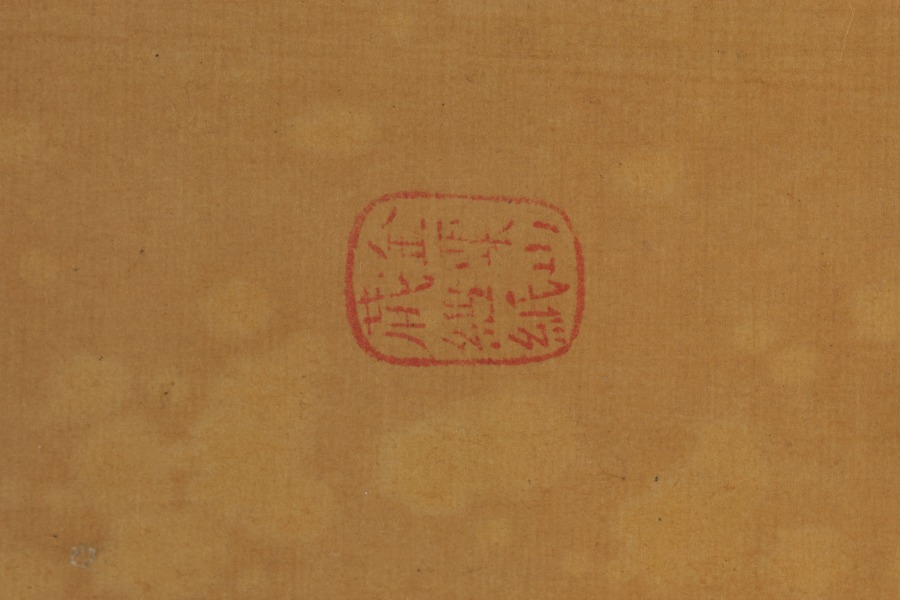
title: Flowers of Four Seasons, with Poems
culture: China, Ming dynasty (1368–1644)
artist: Wang Guxiang (Chinese, 1501–1568)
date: 1531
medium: handscroll; ink and light color on silk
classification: Painting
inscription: Artist's inscription, signature, and 15 seals. Ink Orchids. Sewn as pendants for the man of worth, swaying quiety, fragrance in the valley. [seal] Hsiao-chu ts'un Peony. Wiping his face, the young gentleman Ho [Ho Yen of Wei, Three Kingdoms] appears to have been powdered. His previous life was the perfume-stealing Han Shou [of Chin, 265–419 CE], the fragrance still lingers. [seal] Ts'un-wu chai. Flowering Crab Apple, New Bamboo. Shao-lin [Du Fu, 712–770] had to put down his brush. [Flowering Crab Apple]. Yü-k'o [Wen T'ung, d. 1079) in vain wrote poems about [Bamboo]. [seal] Yu-shih. Lotus Flowers. When she turns her head, half-hidden by a fan, and casts a glance, all the beautiful women become colorless. [seal] K'ang yüeh huai. Loquat. Ripeness in summer. [seal] Lu-chih. Pomegranate Flower. Whenever I remember you I will send my thoughts, but where have you gone--the [skirt] of pomegranate red? [seal] Wu-ho Sheng. Day Lily. Plant the day lily to forget sorrow. [seal] Yu-shih. Chrysanthemum. The untrammelled joy at the eastern fence. [seal] Lu-chih. Begonia. Comparing it to the beauties of Spring, and spreading them out as trimming for the stone steps. [seal] Yu-shih. Hibiscus. In recent years I have always enjoyed looking at flowers; instead of dark red I preferred pink ones. [seal] Jen-sheng i-lou. Narcissus, Camellia. The jade girdle left behind at Lo River. [Narcissus]. The precious pearls glitter before Spring. [Camellia]. [seal] Lu-chih. Heavenly Bamboo (Nandina domestica). A single branch in the wintry season. [seal] K'ang yüeh huai. Plum. Fragrant snow in the Lo-fou Mountains. [seal] Ts'un-wu chai. In the eleventh lunar month of the hsin-mao year of the Jiaqing era [1531], [I] imitated the boneless style of Yüan masters in sketching from life. Guxiang [seals] Yu-shih; Lu-chih. Translated by Wai-kam Ho/Lingyun Shih Liu (1980)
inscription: 2 colophons and 23 additional seals: 1 colophon dated 1632, and 2 seals of Li Jih-hua [Li Rihua] 李日華 (1565–1635); 1 colophon and 2 seals of Xiang Shengmo 項聖謨 (1597–1658); 3 seals of Liang Qingbiao 梁清標 (1620–1691); 6 seals of the Jiaqing 嘉慶 emperor (r. 1796–1820); 9 seals of Ch'eng Ch'i [Cheng Qi] 程琦 (1911–1988)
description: In this painting, flowers are loosely arranged by the seasons: narcissus and peony represent early spring; yellow loquat and lotus, summer; chrysanthemum, autumn; and the plum and evergreen bamboo, winter. The artist added to each flower a poetic line of calligraphy associating each plant with a historic or legendary figure. For example, the chrysanthemum, along with the line “The untrammeled joy at the eastern fence,” refers to the poet Tao Yuanming (died AD 427) who enjoyed chrysanthemums at the eastern fence in his garden. The scroll illustrates Wang Guxiang’s mastery of free brushwork, combining light monochrome ink with transparent colors. In his inscription, Wang says he used the “boneless” style without outlines as developed during the Yuan dynasty (1279–1368). Wang was a native of Changzhou, a city in southeast China known for its rich flora and fauna, and flower-and-bird painting tradition.